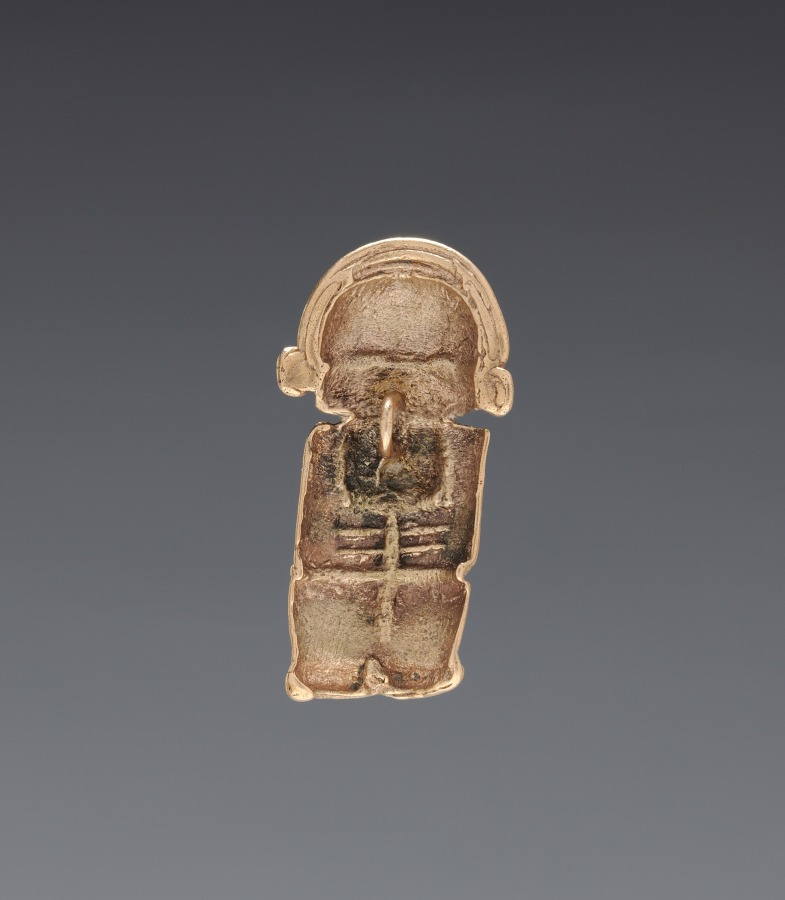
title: Necklace Figurine Bead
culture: Colombia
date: 1–700 CE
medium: cast gold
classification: Jewelry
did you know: Working with gold dates back to at least 500 BC in Ecuador and Colombia.